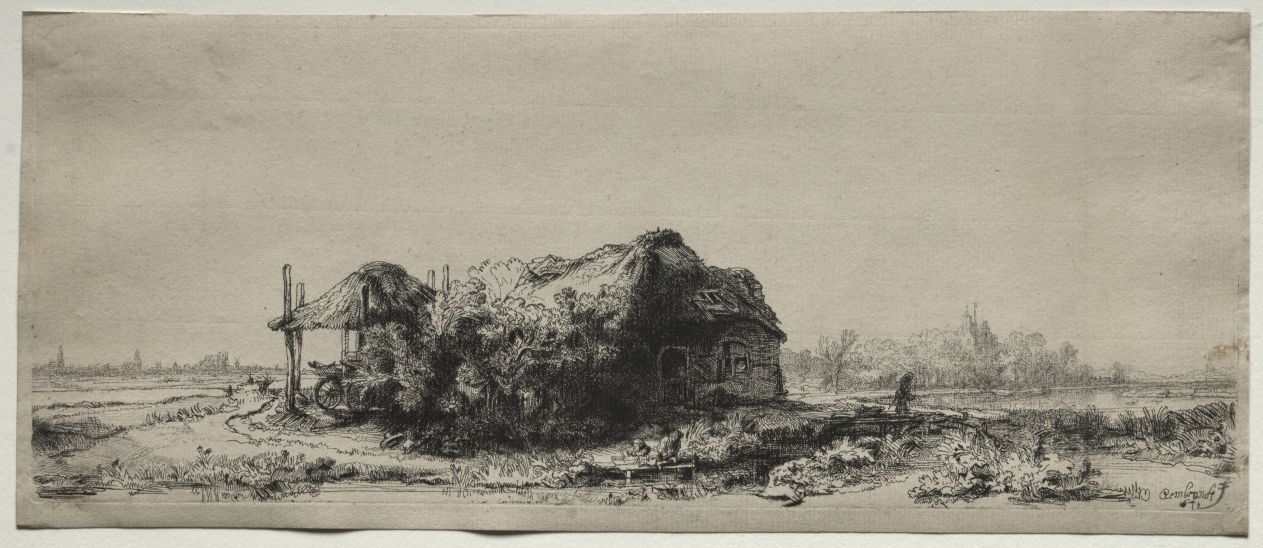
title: Landscape with a Cottage and Hay Barn: Oblong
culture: Netherlands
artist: Rembrandt van Rijn (Dutch, 1606–1669)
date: 1641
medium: etching and drypoint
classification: Print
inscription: lower right, in plate: Rembrandt f / 1641 ; VERSO,upper right, in pen and brown ink: JCG[crossed out] / a:a / Mr[o?]-- ; upper right, in graphite: J.P. / 1800 ; lower left, in graphite: John Mac Gowan F.R.S. 1780-1804; lower left, in graphite: [f2 3?] ; lower right, in pen and brown ink: W Sherlock 1806 ; lower right, in graphite: Th Wilson